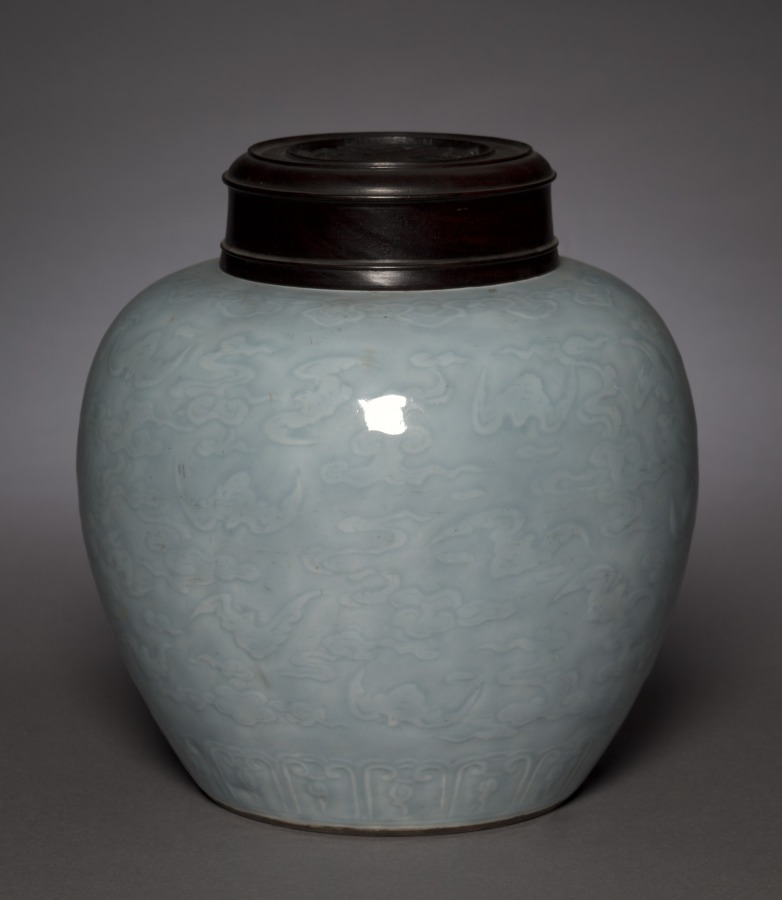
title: Jar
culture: China, Qing dynasty (1644–1911), Qianlong reign (1736–95)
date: 1736–95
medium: porcelain with molded decoration and blue glaze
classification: Ceramic